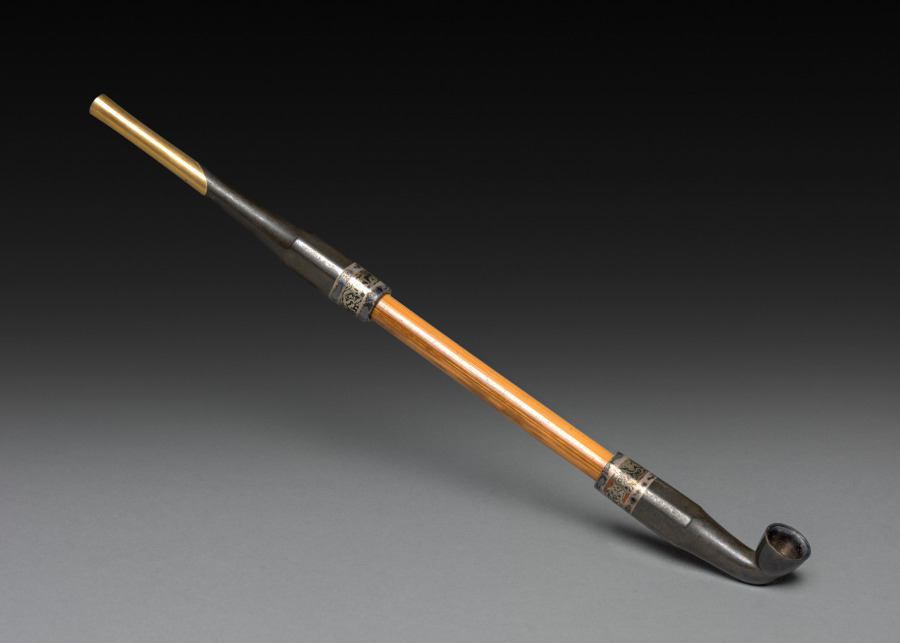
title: Tobacco Pipe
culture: Japan, Edo period (1615–1868)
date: early to mid-1800s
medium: bamboo, iron, and silver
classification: Miscellaneous